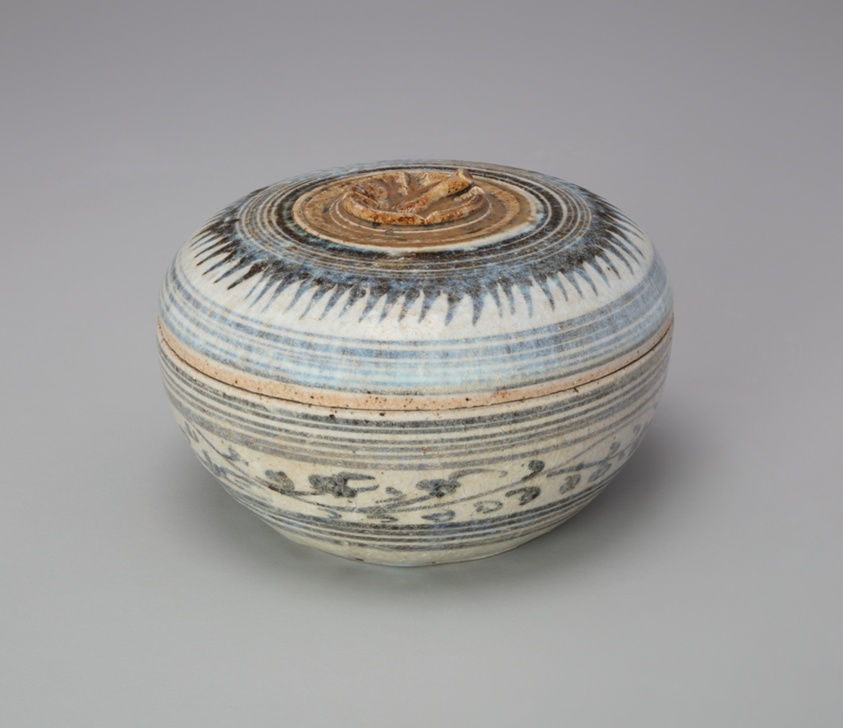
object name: Vessel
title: Sawankhalok Ware Covered Box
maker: Thailand, Sukhothai Province, Si Satchanalai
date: 14th/15th century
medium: Glazed stoneware with iron-brown and blue-grey underglaze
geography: Sawankhalok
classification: ceramics; asian art; vessel